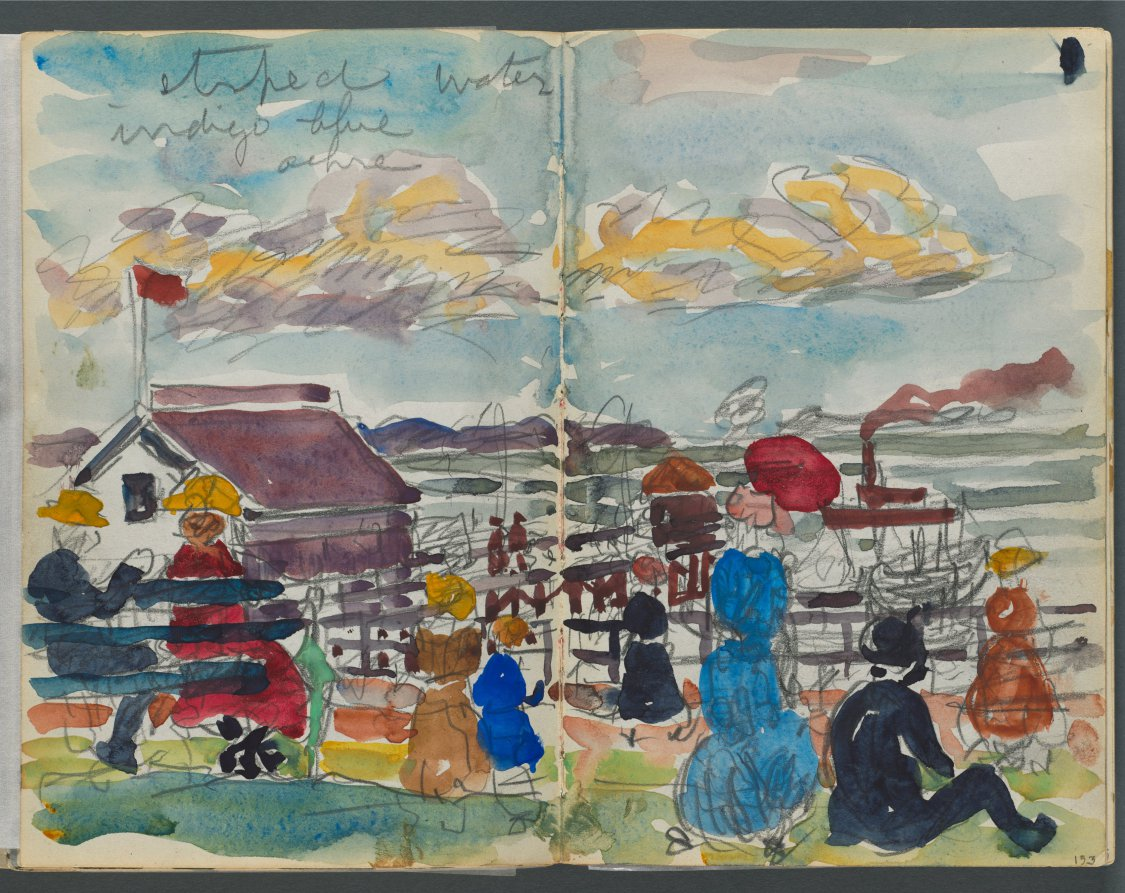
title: Sketchbook, The Dells, N° 127, page 152 & 153: Figures on a Coast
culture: America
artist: Maurice Prendergast (American, born Newfoundland [now Canada], 1858–1924)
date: c. 1919–1921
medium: graphite and watercolor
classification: Bound Volume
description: This sketchbook contains 59 pages of graphite drawings and 16 watercolors made at various locations on Cape Ann, Massachusetts.